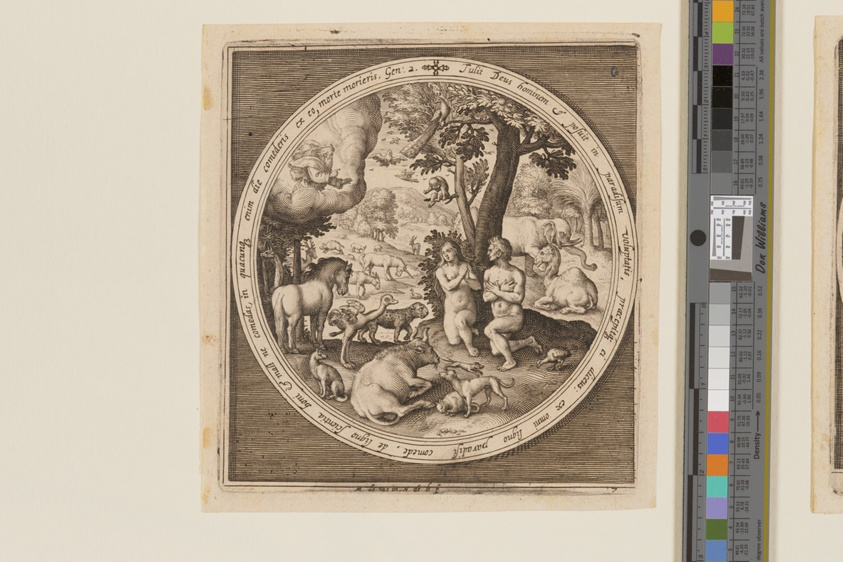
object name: Print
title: Adam and Eve in Paradise, from The Creation to the Expulsion from Paradise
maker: Nicolaes de Bruyn (Flemish, 1571–1656); after Maarten de Vos (Flemish, 1532–1603)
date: c. 1610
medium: Engraving on ivory laid paper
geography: Flanders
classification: engraving; paper; print; prints and drawing